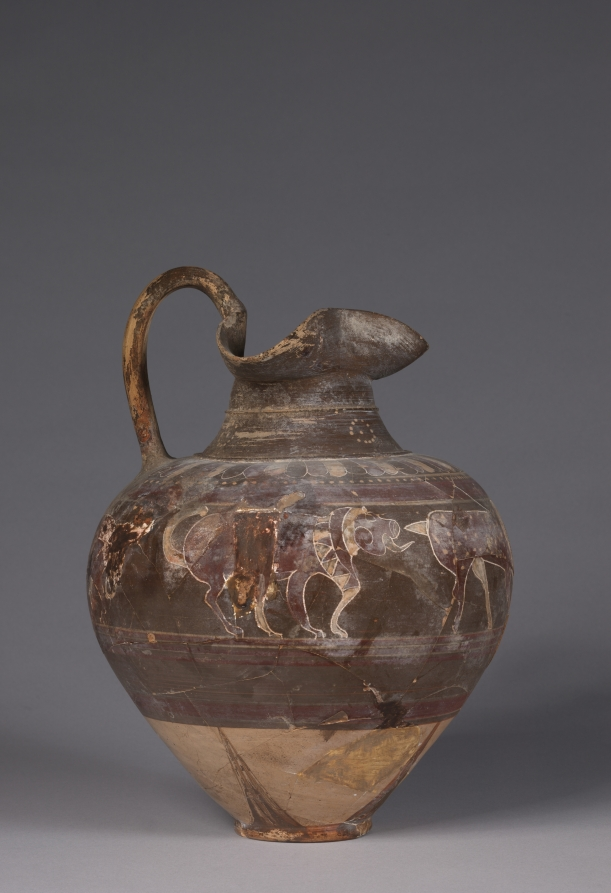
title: Polychrome Oinochoe (Wine Jug): Deer and Lions (?)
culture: Etruscan (Etrusco-Corinthian), probably made at Vulci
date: c. 600–575 BCE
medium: ceramic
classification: Ceramic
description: The animal frieze decorating the widest part of this round-bodied wine jug recalls black-figure pottery imported to Etruria from Greece (especially Corinth). The shape itself, with trefoil mouth and raised handle to facilitate pouring, also resembles Greek models, as do the simple tongues and rays above and below. But the polychromed animals—brightly painted with added white and reddish-purple—identify the vase as Etruscan, likely made at Vulci. The two deer seem to be grazing on stylized plants, unconcerned about the unusual animals pursuing them; these may be lions with horns and long tongues.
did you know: Four animals encircle this jug—two grazing deer and two predators, perhaps lions.